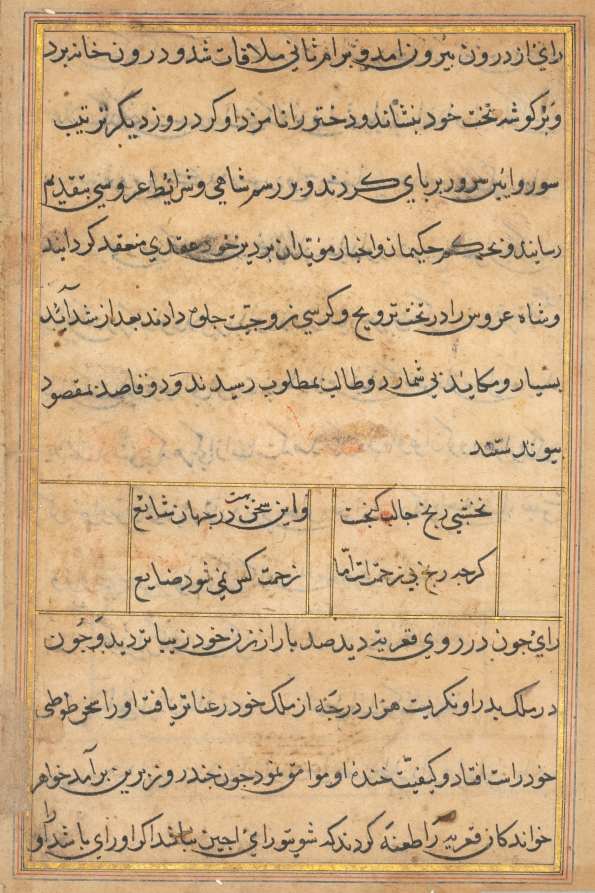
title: Page from Tales of a Parrot (Tuti-nama): text page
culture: Mughal India, court of Akbar (reigned 1556–1605)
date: c. 1560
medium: gum tempera, ink, and gold on paper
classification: Painting